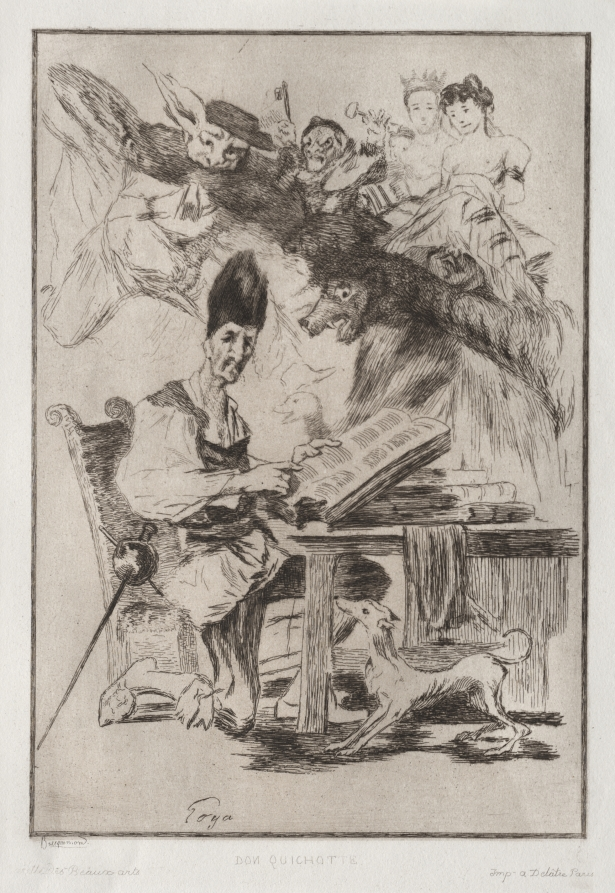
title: Don Quichote, after Goya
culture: France, 19th century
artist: Félix Bracquemond (French, 1833–1914)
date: 1860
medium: etching in brown ink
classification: Print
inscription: in lower margin, printed: Bracquemond / Gazette-des-Beaux Arts / Don Quichotte/ Imp. A Delâtre Paris